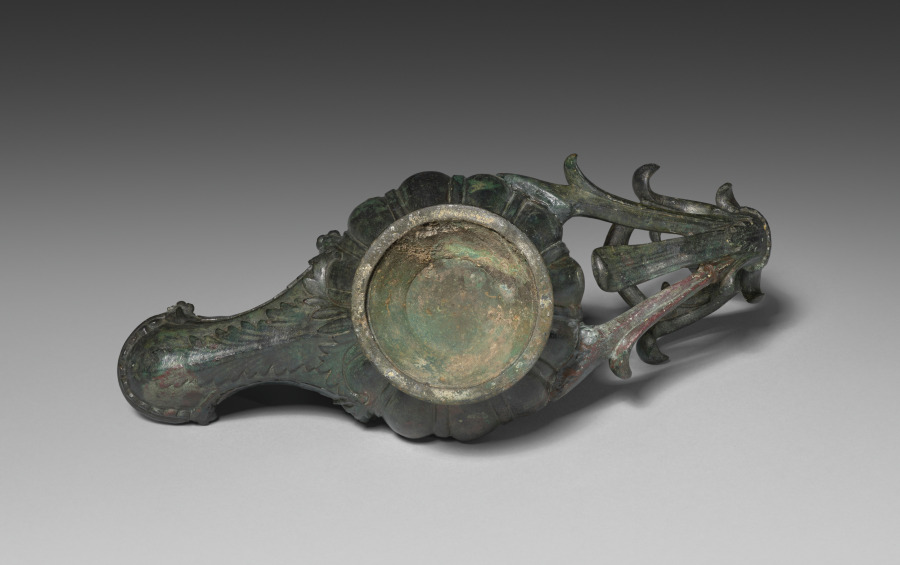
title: Oil Lamp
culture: Roman, late Republican-early Imperial (c. 50 BCE – 50 CE)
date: c. 50 BCE–50 CE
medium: Bronze, cast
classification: Metalwork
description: This large and ornate cast bronze oil lamp features a central hole for filling and a single spout for its wick. Its extravagant handle rises to create both a loop and a sort of hook, one or both of which may have served to suspend the lamp when lit. Alternatively, the lamp may have stood on its own, perhaps atop a tall lampstand. While its primary function may have been for lighting dark spaces, this lamp must also have served an ornamental purpose.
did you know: When used, this lamp likely hung from the ceiling or stood on a tall lampstand.